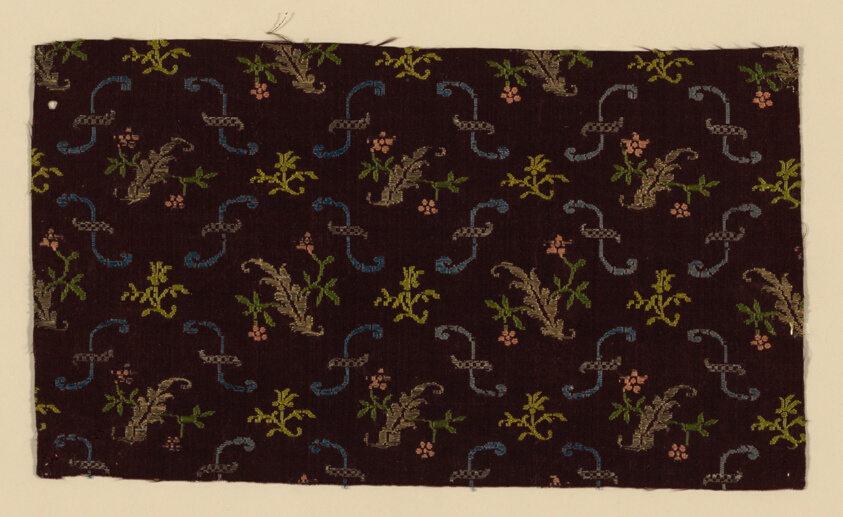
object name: Textile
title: Fragment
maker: Spain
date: 17th century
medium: Brocaded silk, plain cloth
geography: Spain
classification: textile; weaving